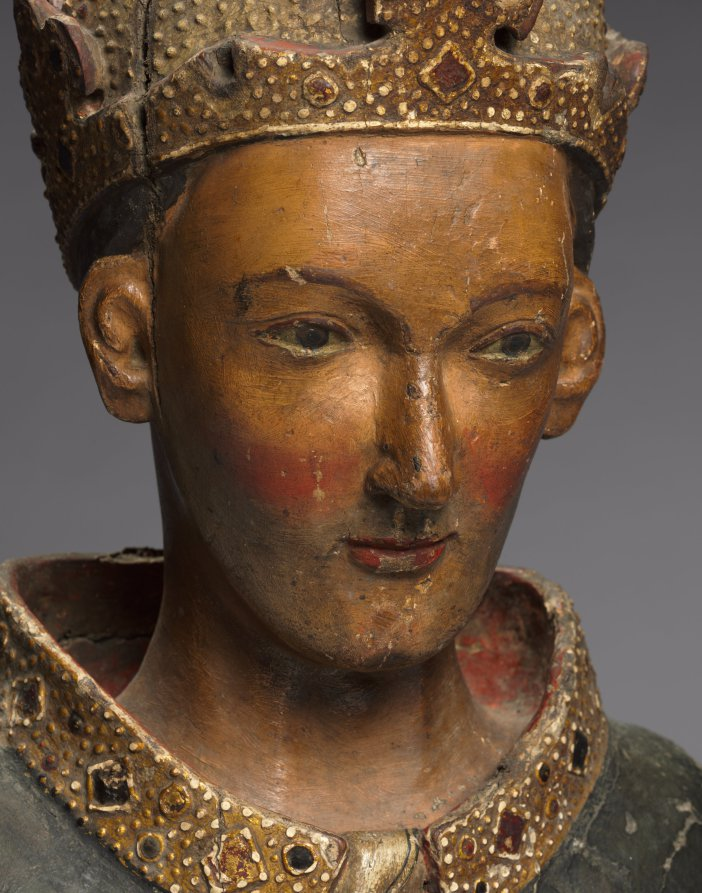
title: Bust Reliquary of St. Louis, Bishop of Toulouse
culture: Italy, Tuscany, Siena(?)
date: late 1300s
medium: wood (walnut) with polychromy, gesso and gilding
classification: Sculpture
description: This reliquary bust was probably made to house a relic of Saint Louis, Bishop of Toulouse (1274–97), second son of Charles II of Anjou, King of Naples (1288–1309). Renowned for his works of charity, he was made bishop in 1297 and died shortly after at the age of 23. He was canonized in 1317, and his cult of veneration spread rapidly in Italy and Spain. In art, Louis is generally represented as a "boy" bishop without a beard and with youthful features. The relic (now lost) would have been enshrined within. On feast days the reliquary would have likely been carried in procession and otherwise placed in a church sanctuary or on a side altar for the veneration of the faithful. Relics were the physical remains of the saints, chiefly their bodies. The living venerated the relics of the saints in order to seek their patronage, which in turn provided a proximate link to the divine ruler. The power of the saints was therefore manifested by and through their relics, or objects that were owned or touched by them. Medieval pilgrims, in a world fraught with peril, sought close physical contact with relics, which protected both the spiritual and temporal welfare of laypeople and religious communities.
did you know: This small bust was hewn out of wood, but painted realistically. Its life-like accuracy gave the medieval worshipper the sense that they were in the presence of the beloved bishop Saint Toulouse.